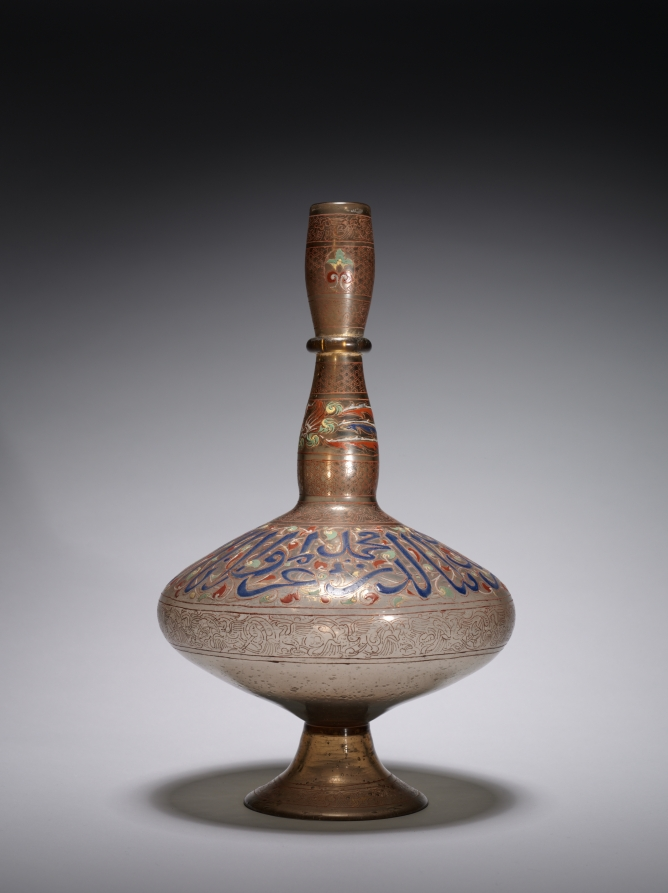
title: Bottle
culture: Europe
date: c. 1900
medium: glass with enameled and gilded decoration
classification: Glass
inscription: The inscription translates: "Glory to our lord, the sultan, the king, the victorious, the protector of the world and the religion, Muhammed."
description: The bold inscription on the body of the bottle translates: “Glory to our lord, the sultan, the king, the victorious, the protector of the world and the religion, Muhammad.” The sultan referred to here is the Mamluk ruler Muhammad ibn Qala’un (1285–1341), who is also referenced on the nearby mosque lamp. This bottle, as with the mosque lamp CMA 1981.10, is representative of reproductions of Mamluk glass that were prominent in the late 1800s in Europe during a period of resurgence of interest in Islamic art. At this time, collectors and artists revived the techniques of enameling and gilding that are hallmarks of Mamluk glass.